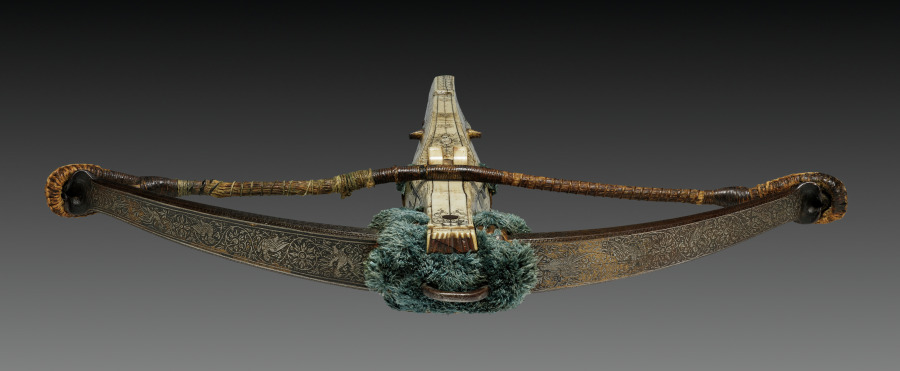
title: Crossbow of Elector Augustus I of Saxony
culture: Germany, Saxony, 16th century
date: c. 1553–73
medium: wood (walnut?), bone veneers, flax cord, steel (etched, traces of gilding). woolen pompoms, stock decorated wih inlaid trophies of arms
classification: Arms and Armor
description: This crossbow was a hunting weapon for Prince Elector Augustus I, a member of the ruling elite in the Holy Roman Empire. Augustus, powerful and wealthy, had even the most practical instruments ornately decorated, including this crossbow and its cranequin, or winding device.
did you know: Augustus was a marksman who took part in crossbow competitions. He had a large collection and often gave them to friends.